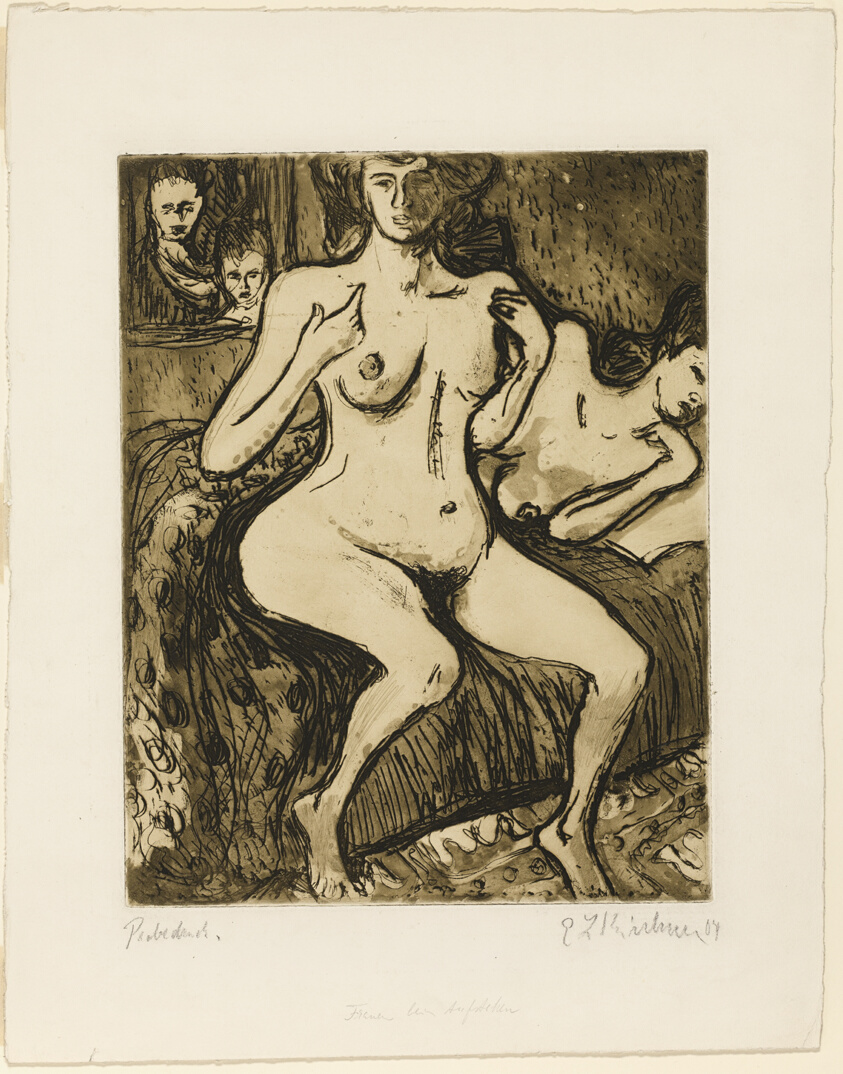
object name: Print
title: Two Sisters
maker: Ernst Ludwig Kirchner (German, 1880-1938)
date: 1908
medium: Etching, from a zinc plate, in olive-green on white wove paper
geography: Germany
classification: etching; print; prints and drawing